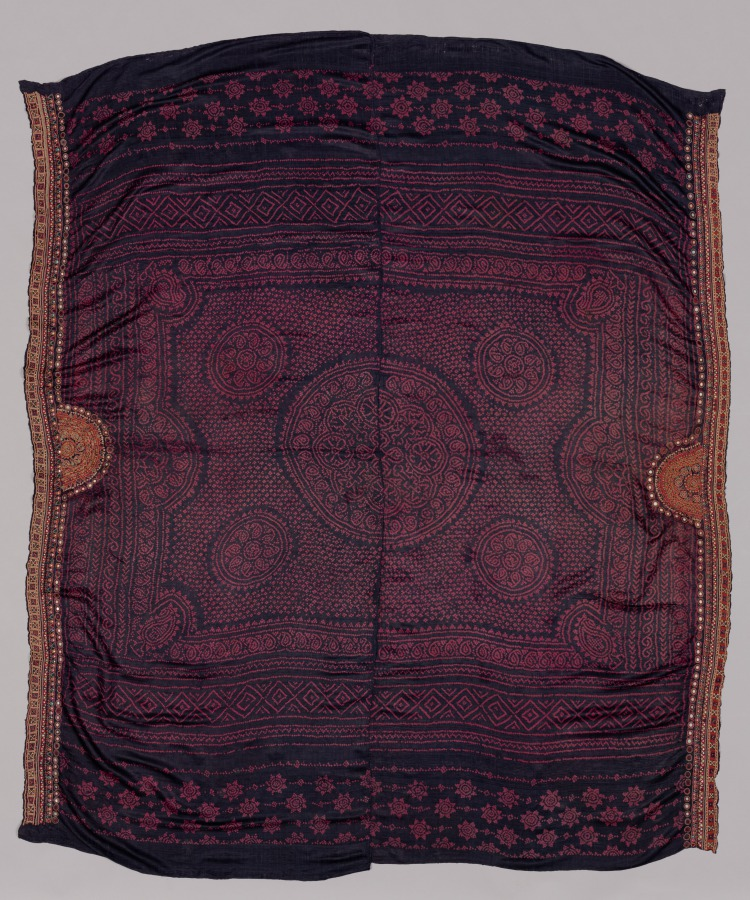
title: Sari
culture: India, 19th century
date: 1800s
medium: tie-dyed, embroidered borders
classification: Textile